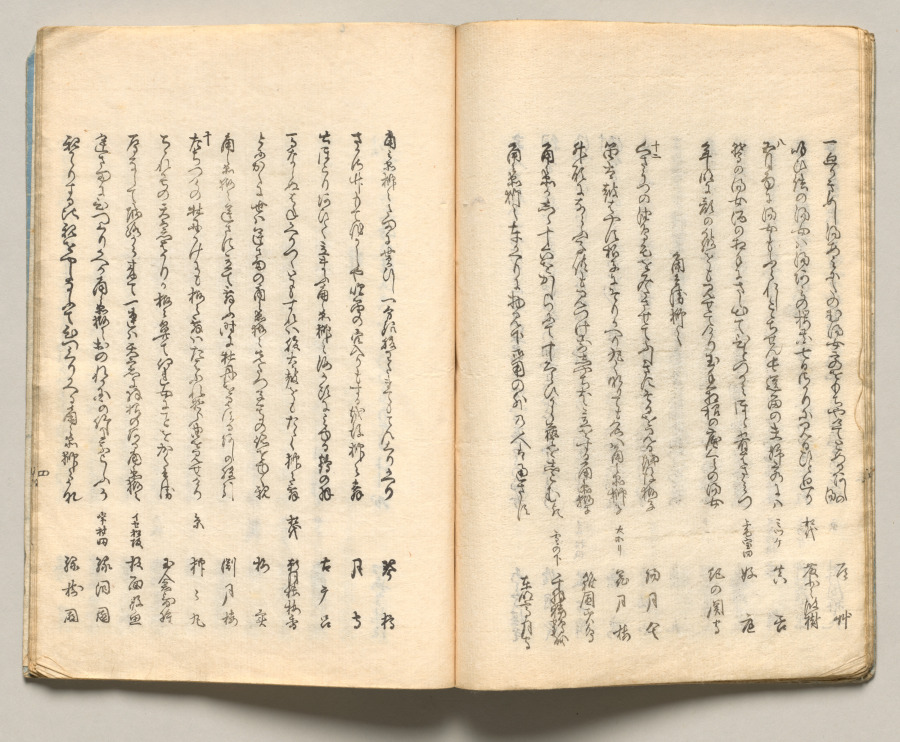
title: Spread Eleven from Volume Six of People of Japan in Light Verse (Kyōka)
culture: Japan, Edo period (1615–1868)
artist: Utagawa Hiroshige (Japanese, 1797–1858)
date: 1857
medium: Woodblock-printed book; ink and color on paper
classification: Bound Volume